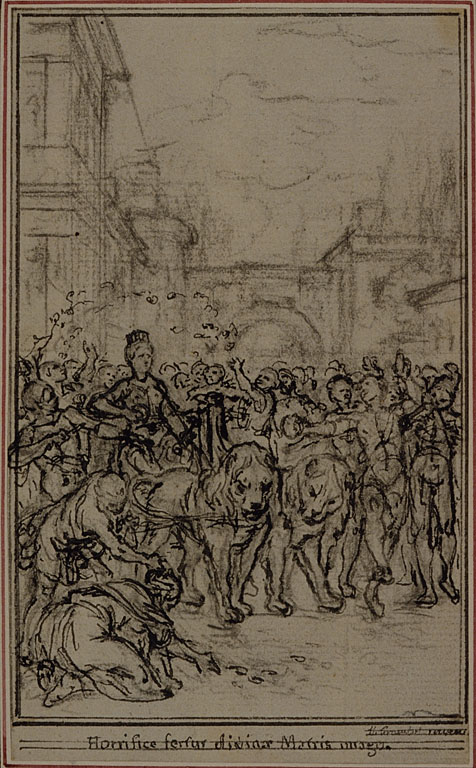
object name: Drawing and Watercolor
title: Study for the Vignette-Frontispiece of Lucretius's "De la Nature des Choses", Book II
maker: Hubert François Gravelot (French, 1699-1773)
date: c. 1768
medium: Pen and black ink, and black chalk, on pale gray laid paper, incised for transfer and perimeter mounted on cream laid paper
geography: France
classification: pen and ink drawings; drawings (visual works); prints and drawing